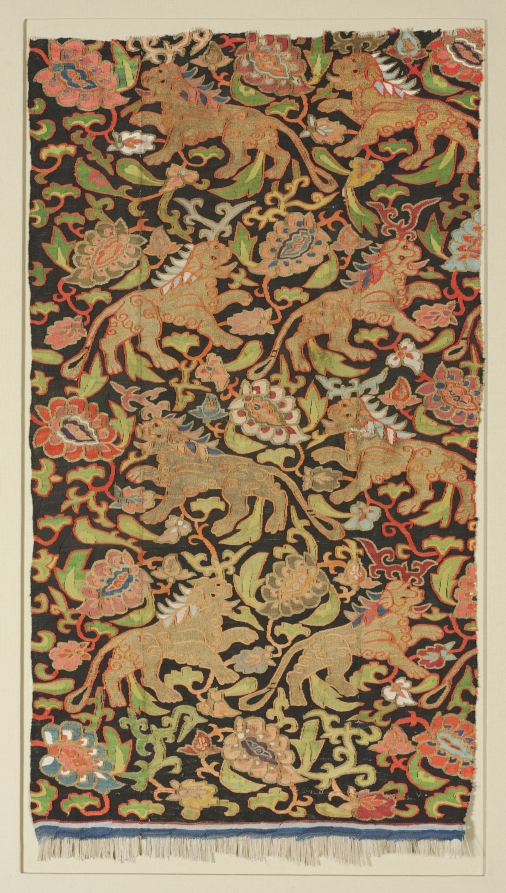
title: Tapestry with golden lions and palmettes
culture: Central Asia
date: 1200s or earlier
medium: silk, gold thread; tapestry weave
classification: Tapestry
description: This reversible tapestry (kesi) fragment, woven with silk and metal thread, is a section from yardage likely intended for a garment, but no contemporary paintings exist to confirm this. A fringe of warps and a striped starting edge are preserved at the bottom of this fragment, as is a selvage along the left edge. Iranian golden lions, traditional symbols of royalty, are depicted amid large palmette leaves on vines. This kesi is different from other Central Asian silk kesi in the repetition of lions and palmettes in horizontal rows, facing alternate directions in an asymmetrical Chinese-inspired layout. But the depiction of lions with parted manes and tilted heads dates from the Sasanian dynasty of Iran (226–637 CE). The palmettes are common to both the Iranian world and Central Asia. This kesi may have been woven by Uyghurs living in the vicinity of Khotan, where the influence of Iranian culture was strong.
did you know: Dye analysis has been done on some of the colored yarns in this fragment. The orange, scarlet, and pink dye comes from the safflower plant, the red and darker pink dye from the bark of a small evergreen tree called the China brasiliensis, and the blue dye from the indigo plant.